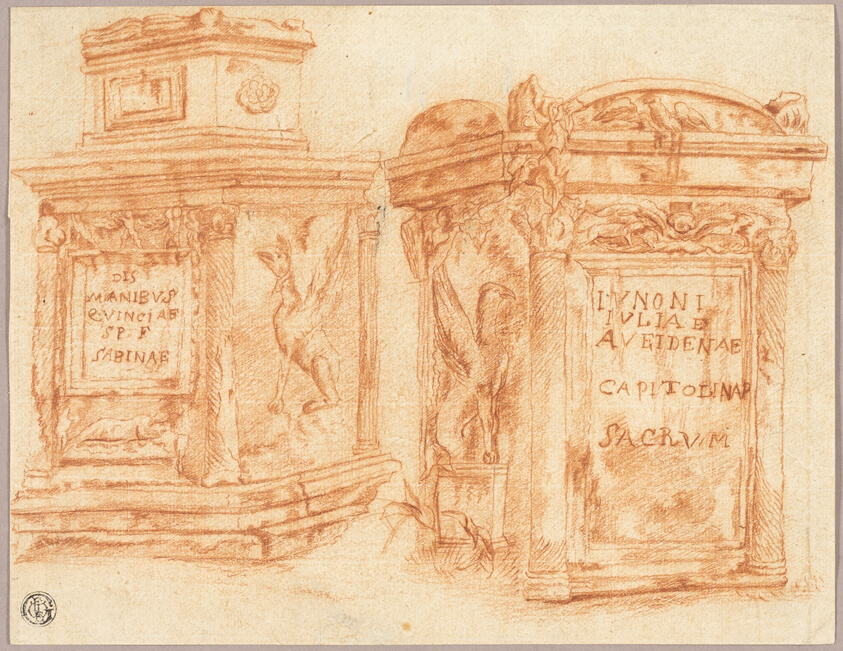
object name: Drawing and Watercolor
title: Sketches of Inscribed Bases of Roman Columns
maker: Nicolas Poussin (French, 1594-1665)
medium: Red chalk on cream laid paper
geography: France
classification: chalk; paper; drawings (visual works); prints and drawing